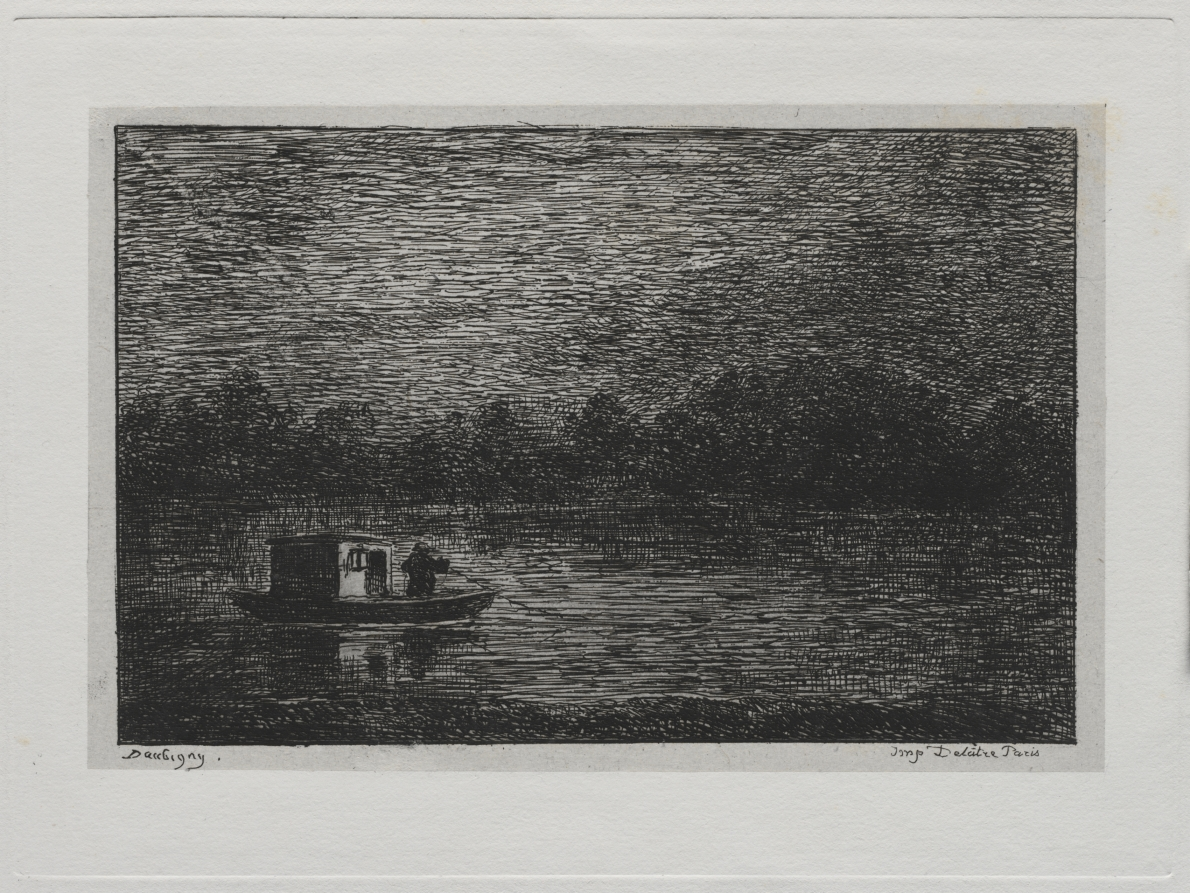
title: The Boat Trip: Night Voyage or Net Fishing (second version)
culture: France, 19th century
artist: Charles François Daubigny (French, 1817–1878)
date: 1861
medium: etching with chine collé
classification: Portfolio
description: lower left corner, in graphite: L. D. 109